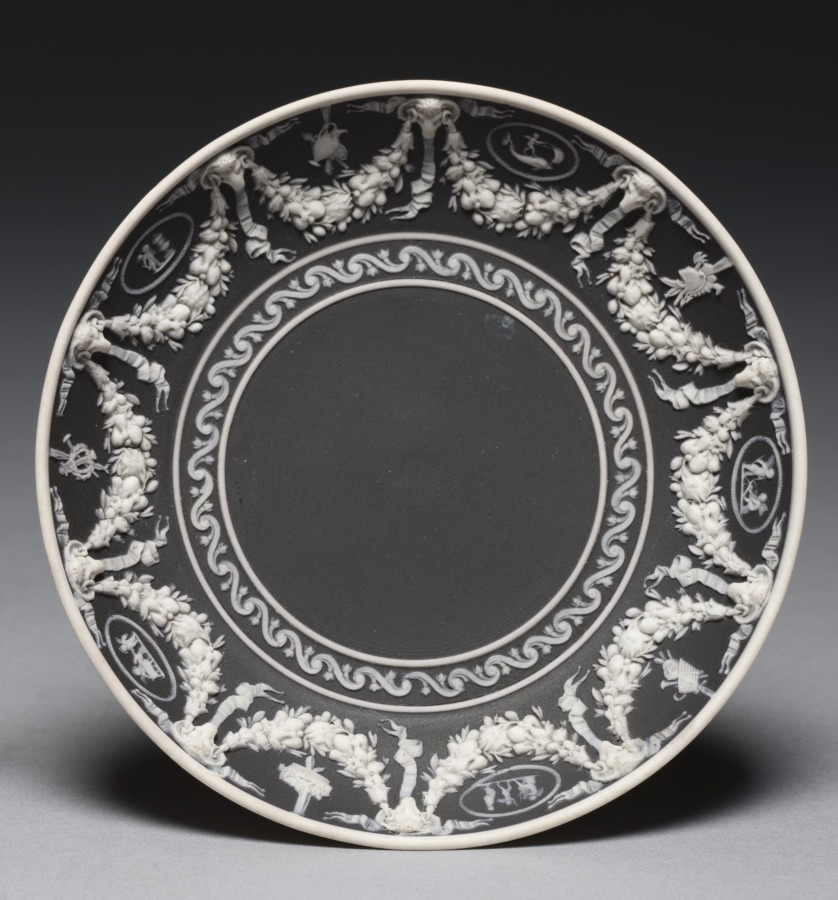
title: Saucer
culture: England, Staffordshire, 18th century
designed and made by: Wedgwood Factory (British)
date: c. 1790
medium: jasper ware with relief decoration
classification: Ceramic